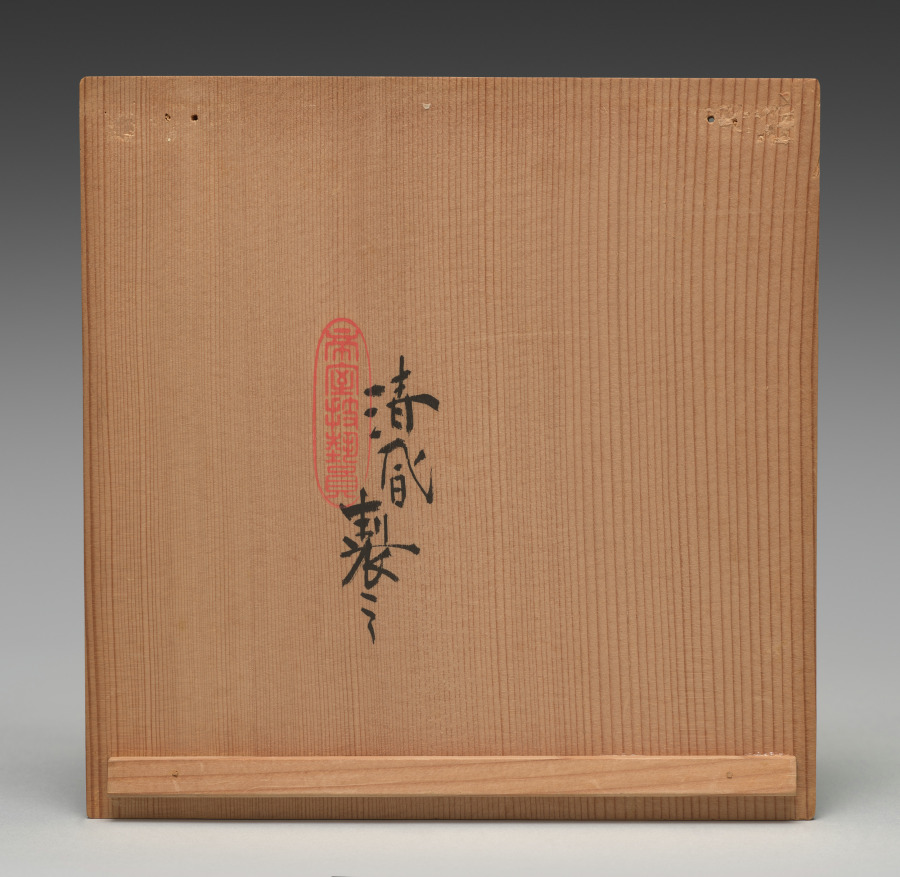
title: Dining Bowl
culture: Japan, Meiji period (1868–1912)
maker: Seifū Yohei III (Japanese, 1851–1914)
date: 1912–14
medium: Porcelain with green glaze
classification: Ceramic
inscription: 共箱の箱書：（蓋表）秘色彩古磁盂（印：清風）；（蓋裏）清風制之（印：帝室技藝員）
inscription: 彫銘：清風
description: This Yohei III dining bowl with an everted rim has a glaze identified in its box lid inscription as hisoku (C. mise), or “mysterious color.” This name typically refers specifically to a type of high-quality, green-glazed ceramic produced in the ninth and tenth centuries at the Yue kilns in China’s Zhejiang Province as tribute ware for the imperial family.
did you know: Many ceramics created by the Seifū Studio refer to and emulate Chinese ceramics in form and glazing.